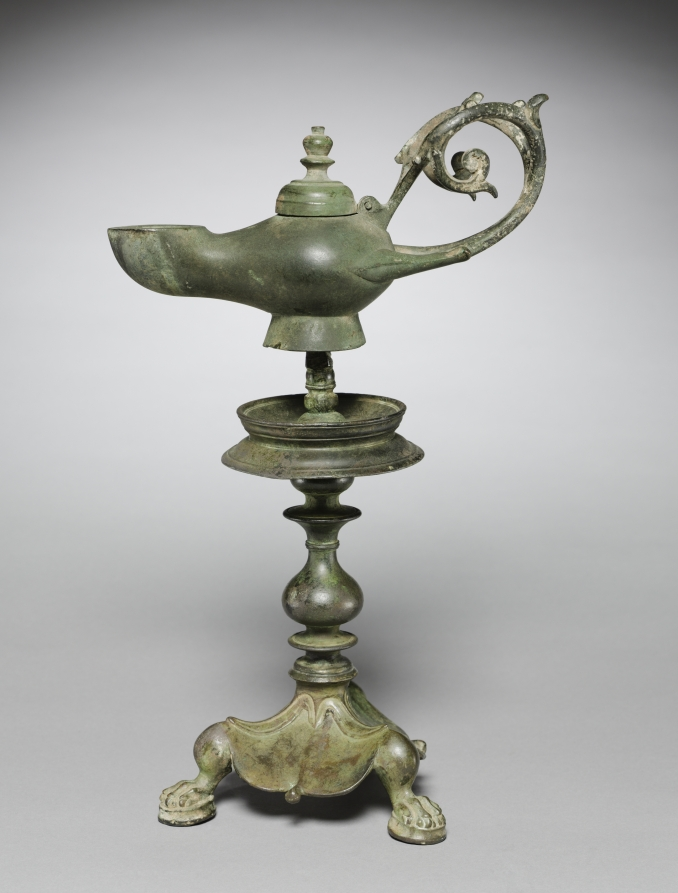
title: Lamp and Stand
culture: Byzantium, early Byzantine period, 5th century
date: 400s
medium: bronze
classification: Metalwork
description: Bronze oil lamps were made either with stands, like the nearby example, or with chains for suspension on hooks within homes and churches. This lamp is cast in the form of a griffin, a guardian figure from antiquity frequently used in Byzantine churches, which contained much wealth. The Christian monogram on the handle indicates the lamp was intended for use within a church.